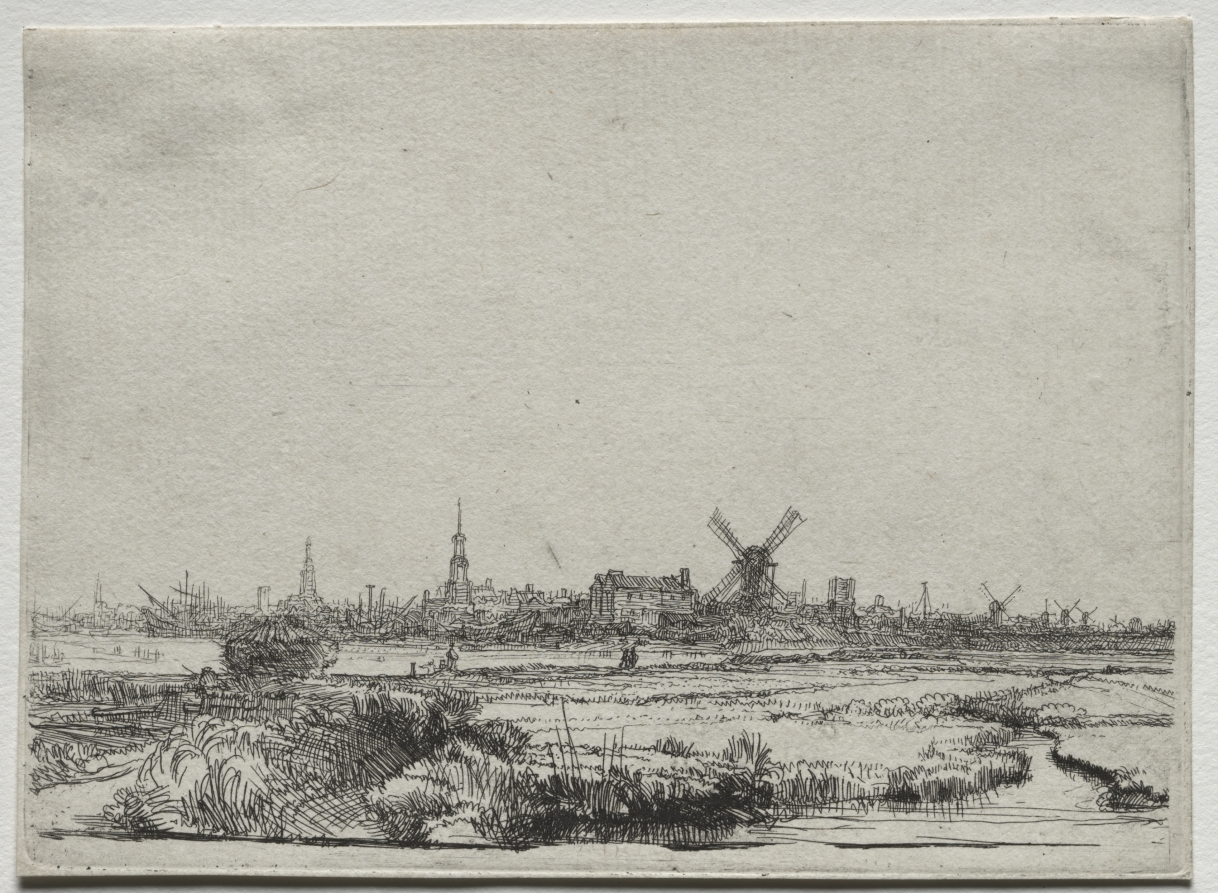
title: View of Amsterdam from the North West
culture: Netherlands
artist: Rembrandt van Rijn (Dutch, 1606–1669)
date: c. 1640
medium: etching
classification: Print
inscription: VERSO, lower center, in graphite: Rl 313. ; lower left, in graphite: [illegible] ; lower left, in graphite: [1?]65 ; lower right, in graphite: Fe[x?] in